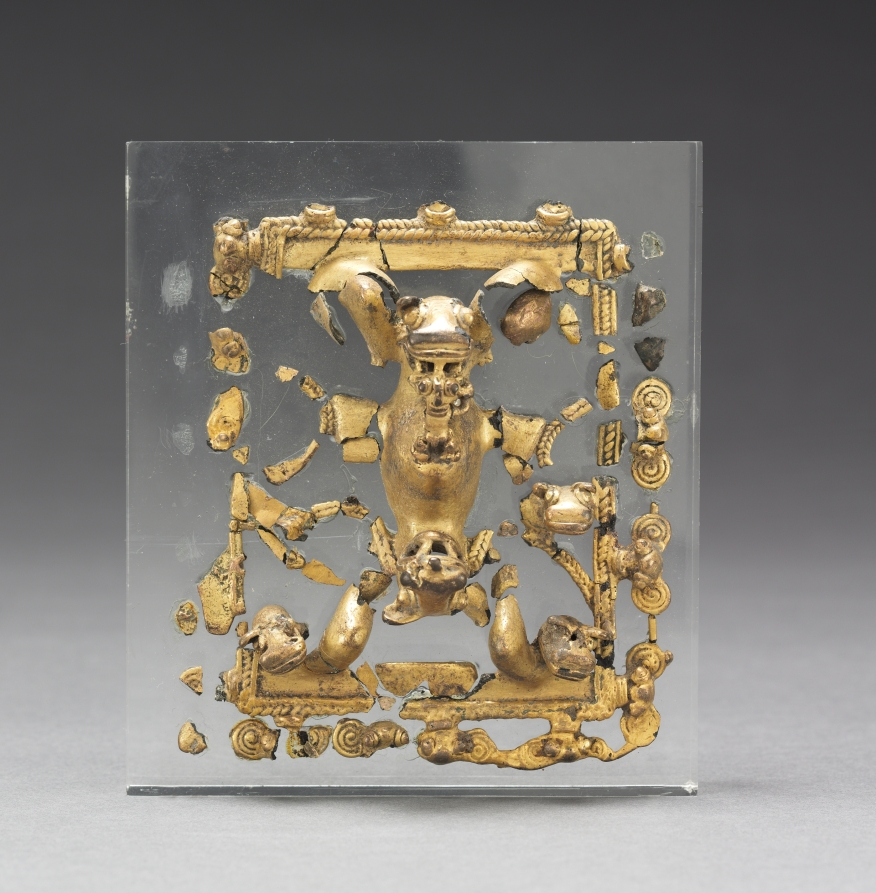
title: Jaguar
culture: Unassigned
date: 700–1550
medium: gold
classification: Metalwork